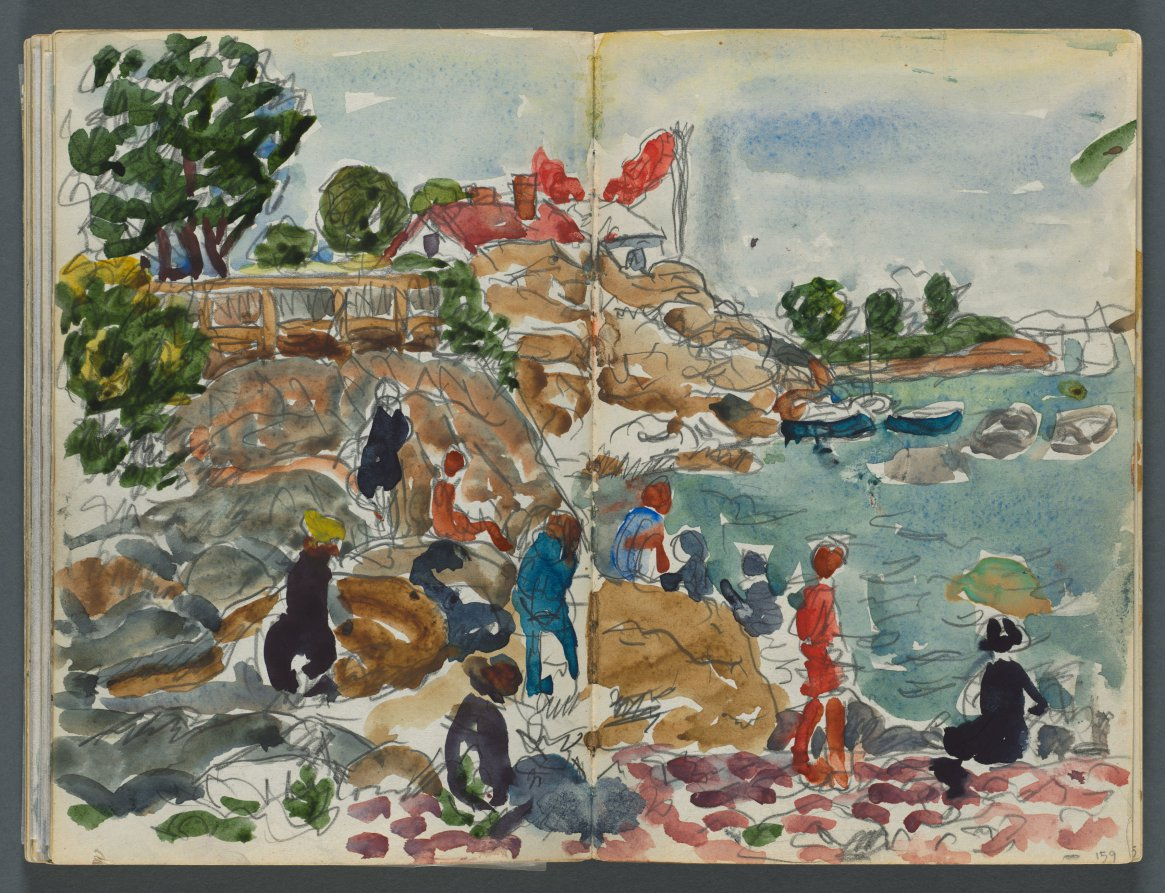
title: Sketchbook, The Dells, N° 127, page 158 & 159: Coastal Landscape with Figures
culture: America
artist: Maurice Prendergast (American, born Newfoundland [now Canada], 1858–1924)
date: c. 1919/21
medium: watercolor with gouache over graphite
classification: Bound Volume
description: This sketchbook contains 59 pages of graphite drawings and 16 watercolors made at various locations on Cape Ann, Massachusetts.